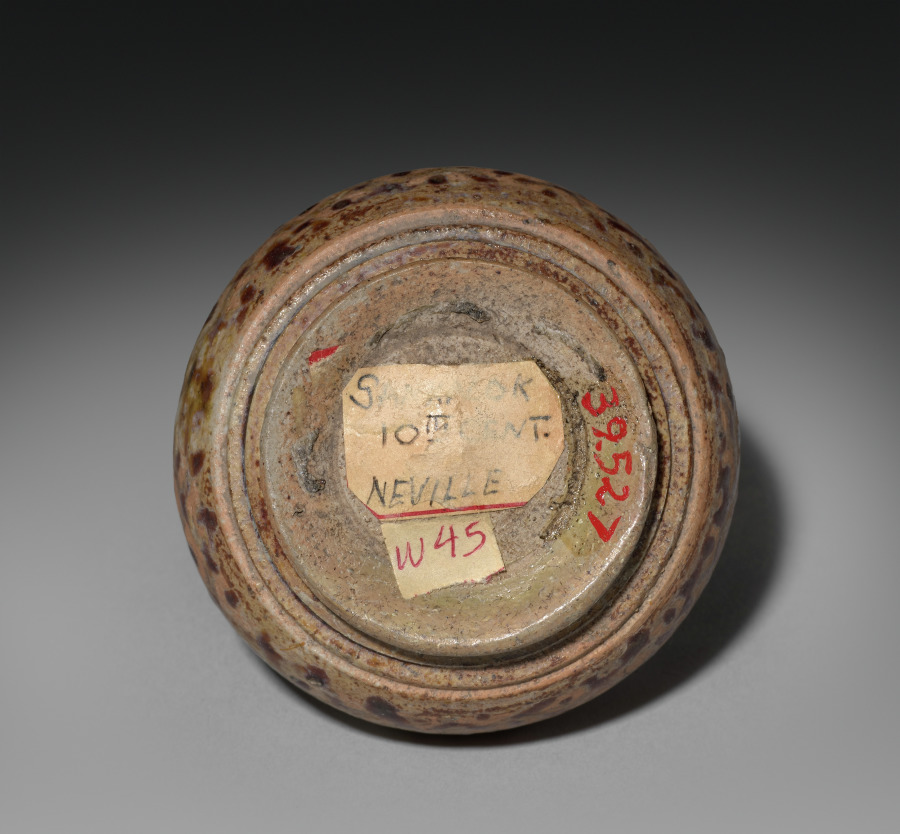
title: Bottle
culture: Siam, Sawankhalok ware, 15th century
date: 1400s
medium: stoneware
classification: Ceramic